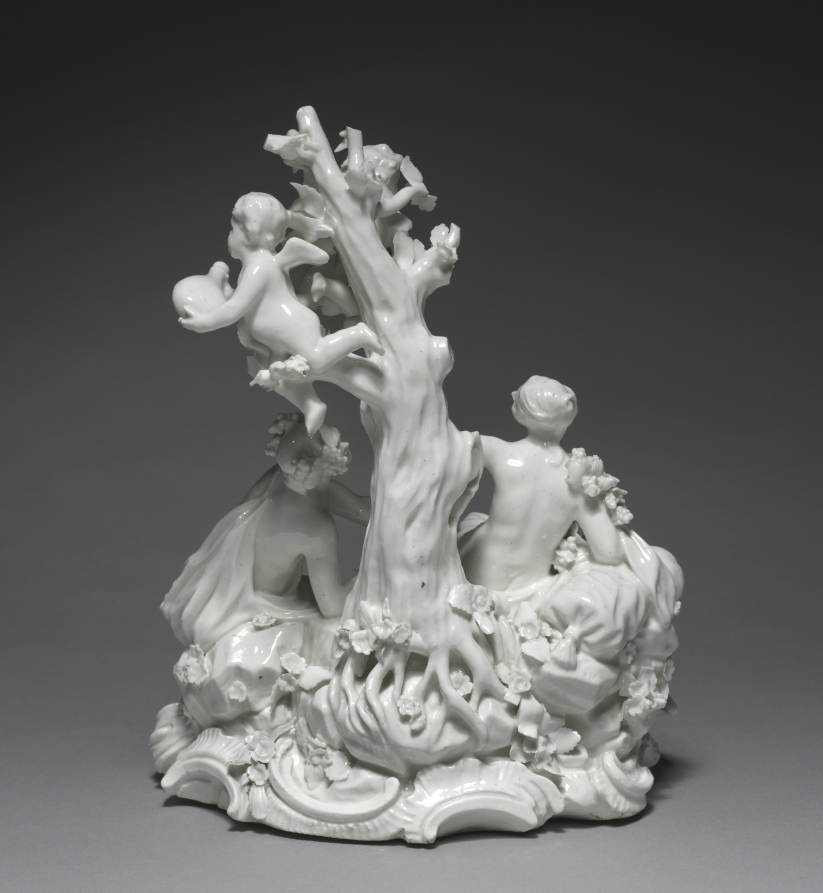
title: Figure Group of Bacchus and Ariadne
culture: Germany, mid-18th century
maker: Orléans Porcelain Factory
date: c. 1759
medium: soft-paste porcelain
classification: Ceramic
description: Porcelain figurines decorated the tabletops and living spaces of wealthy Europeans. Though seen in three-dimensions, their inspiration was often drawn from two-dimensional print sources. Swathed in flowers, this figure group depicts Cretan princess Ariadne pouring a drink for the Roman god of wine, Bacchus. Their pose and surrounding scenery was based on an etching by French engraver Jacques Philippe le Bas.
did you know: This object’s molding and all-white design is characteristic of blanc de chine, the French term referencing the highly prized porcelain produced in the southeastern Fujian province of Dehua, China, known for its pure color and high degree of translucence.